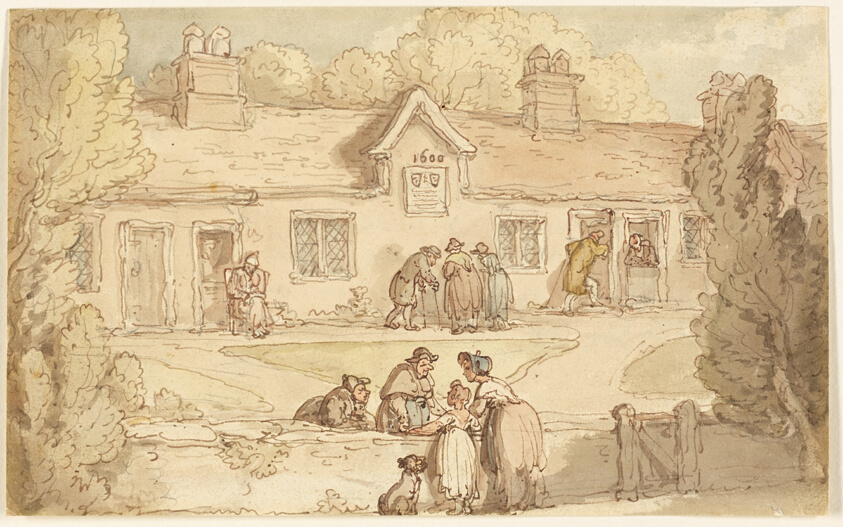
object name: Drawing and Watercolor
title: Alms House of Tottenham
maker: Thomas Rowlandson (English, 1756-1827)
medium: Pen and brown ink with brush and watercolor, over graphite, on cream wove paper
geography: England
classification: watercolor; drawings (visual works); prints and drawing